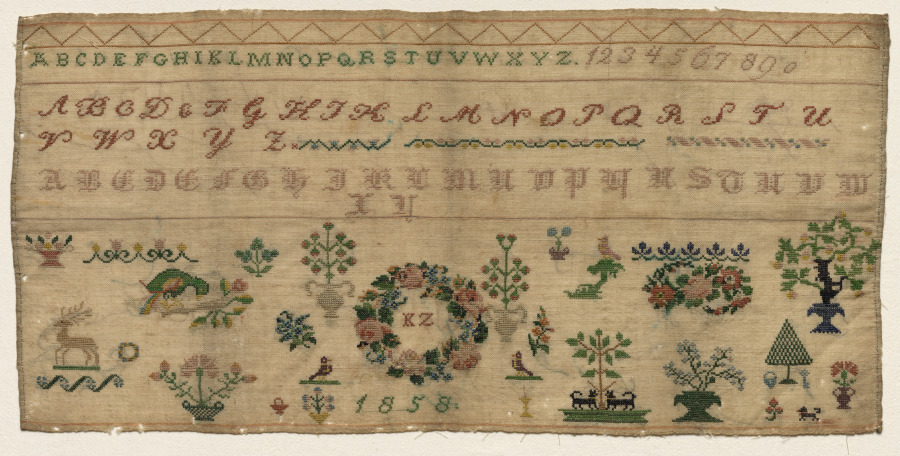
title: Sampler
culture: Austria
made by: Celia Kestenbaum Grossman (Austrian)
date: 1858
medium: linen: embroidery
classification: Sampler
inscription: "K.Z." embroidered in full color on natural linen.